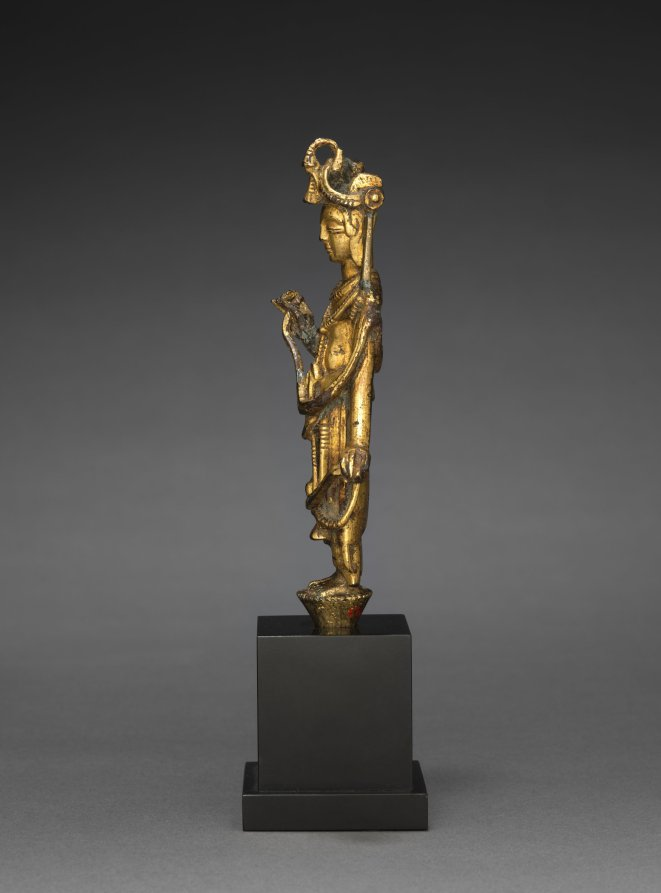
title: Standing Bodhisattva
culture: China, Sui dynasty (581-618)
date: late 500s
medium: gilt bronze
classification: Sculpture